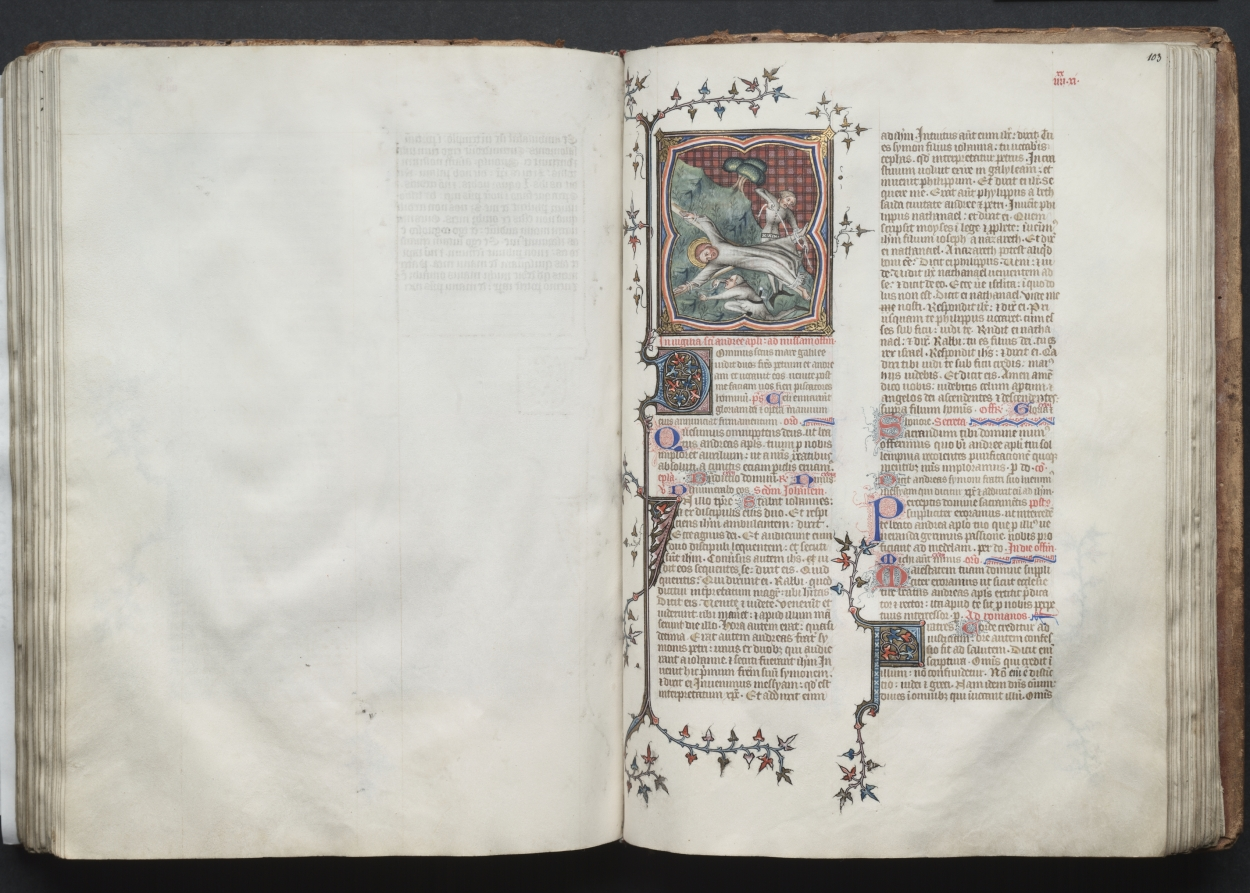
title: The Gotha Missal: Fol. 103r, St. Andrew Being Tied to the Cross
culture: France, Paris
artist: Master of the Boqueteaux (French)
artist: and Workshop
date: c. 1375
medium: ink, tempera, and gold on vellum; blind-tooled leather binding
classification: Bound Volume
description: The style and quality of this manuscript's decoration is typical of deluxe Parisian books made for aristocratic or royal patrons. Most of the book's decoration appears to be the work of the Master of the Boqueteaux, an artist active at the court of King Charles V (died 1380). His style was apparently shared by a number of book illuminators working in and around Paris. It is very possible that the Gotha Missal belonged to Charles V, but is not provable because the manuscript has no royal portraits and lacks a colophon. Given the book's magnificent decoration, however, it would seem that it was produced for a Valois prince, if not for the king himself. The manuscript receives its name from the German dukes of Gotha, its later owners.